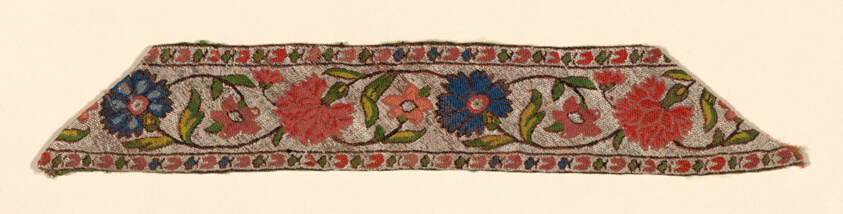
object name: Textile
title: Fragment (Border)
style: kashan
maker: Iran (Persia, Kashan)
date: 18th century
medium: Plain compund cloth, silk and silver wound on white silk core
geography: Iran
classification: textile; weaving